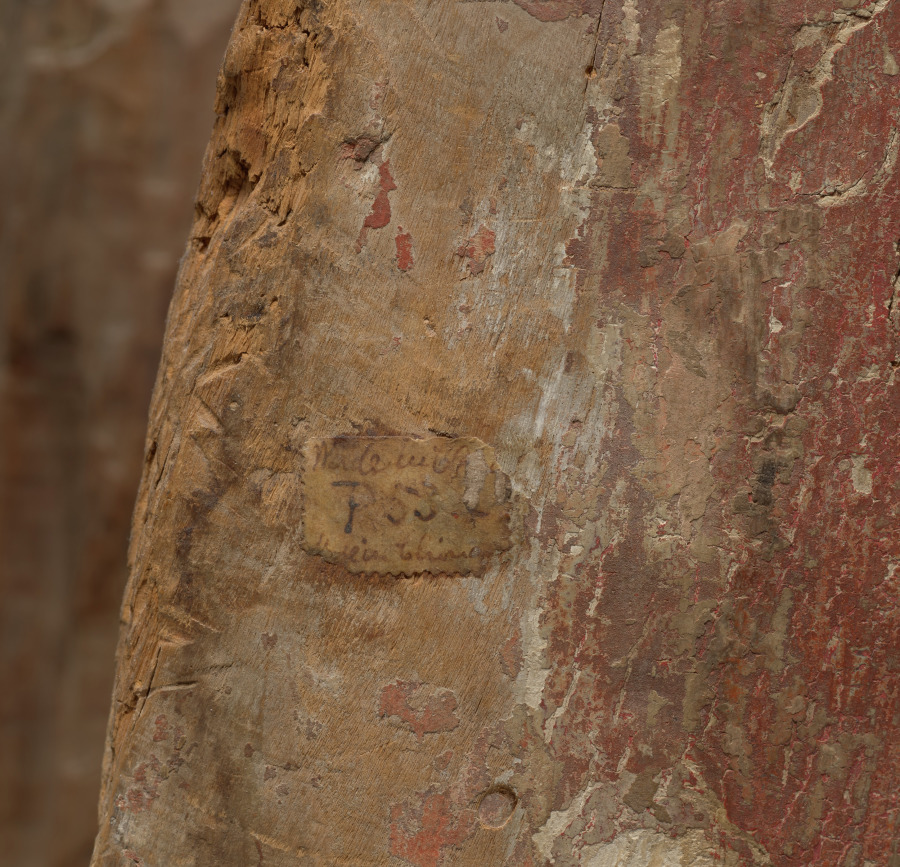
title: Eleven-Headed Guanyin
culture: China, late Northern Song dynasty (960-1127) - Jin dynasty (1115-1234)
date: 1100–1200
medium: wood with polychromy and cut gold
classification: Sculpture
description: The bodhisattva is an enlightened being dedicated to the spiritual awakening of all beings. The compassionate bodhisattva Guanyin, in a variety of manifestations, is probably the most popular deity of worship in Chinese Buddhism. In the Esoteric Buddhist form shown here, this standing Guanyin has a total of eleven heads, with smaller ones above the principal head. The uppermost head represents the Buddha Amitabha, to whom he is closely related. The eleven heads symbolize the Buddha’s steps on the path to enlightenment.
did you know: This Guanyin is carved from a single block of willow (genus Salix sp.).